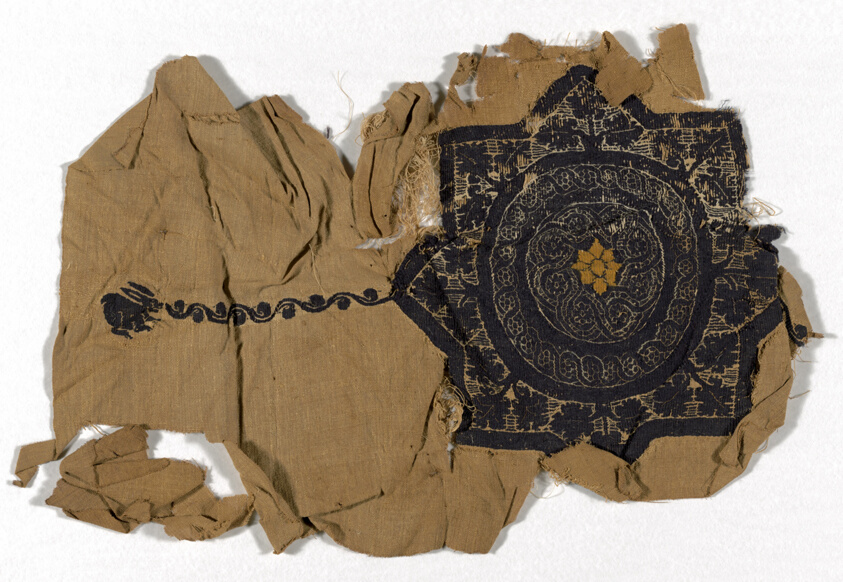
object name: Textile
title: Fragment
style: roman period (egyptian), coptic (period)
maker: Egypt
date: Roman period (30 B.C.– 641 A.D.)/Arab period (641–969)/Fatimid period (969–1171), 3rd/ 10th century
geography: Egypt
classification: textile; weaving